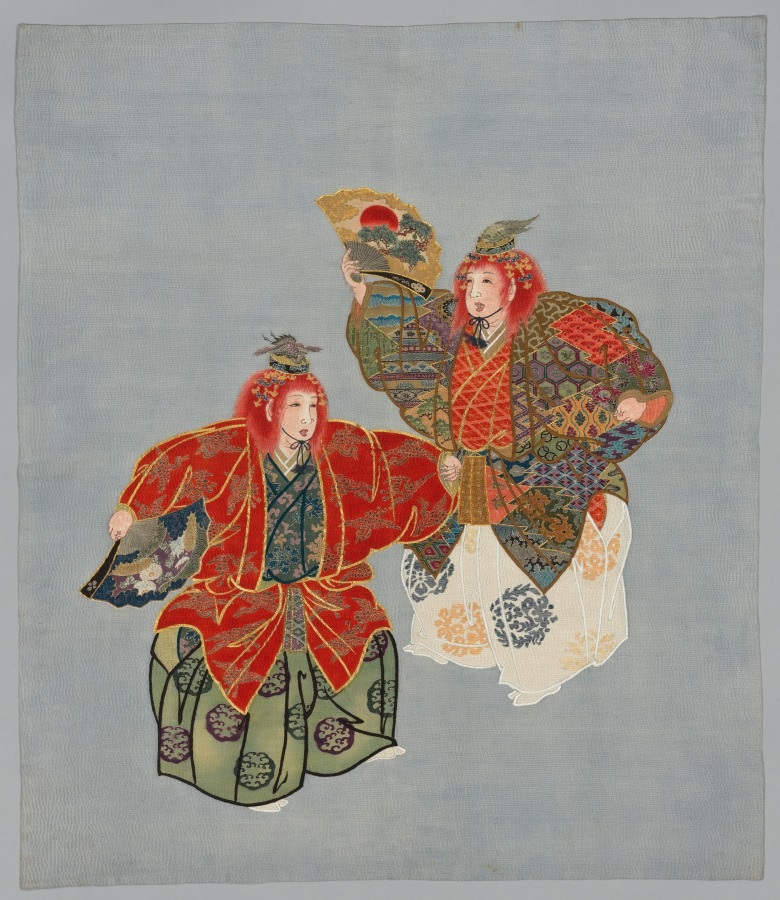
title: Embroidered and Resist-Dyed Fabric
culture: Japan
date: late 1800s-early 1900s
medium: embroidered silk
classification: Embroidery